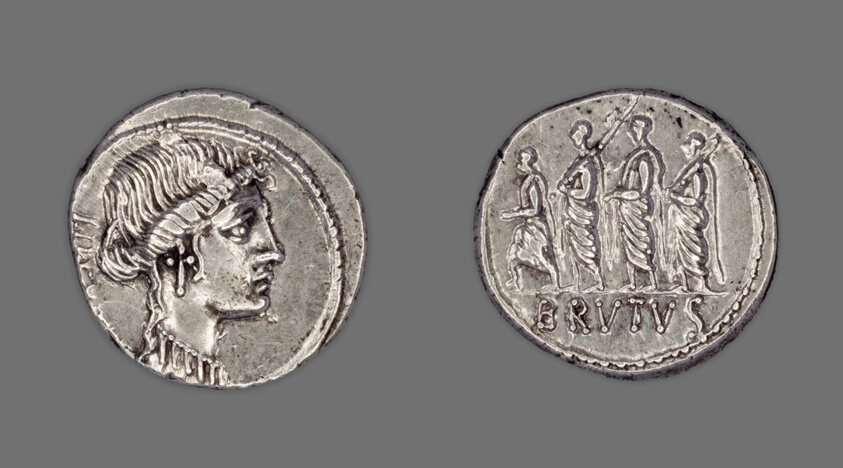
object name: Coin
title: Denarius (Coin) Depicting Liberty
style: roman (ancient, style or period)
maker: Roman, minted in Rome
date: 54 BCE, issued by Roman Republic, M. Junius Brutus (moneyer)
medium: Silver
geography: Roman Empire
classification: coin; ancient art